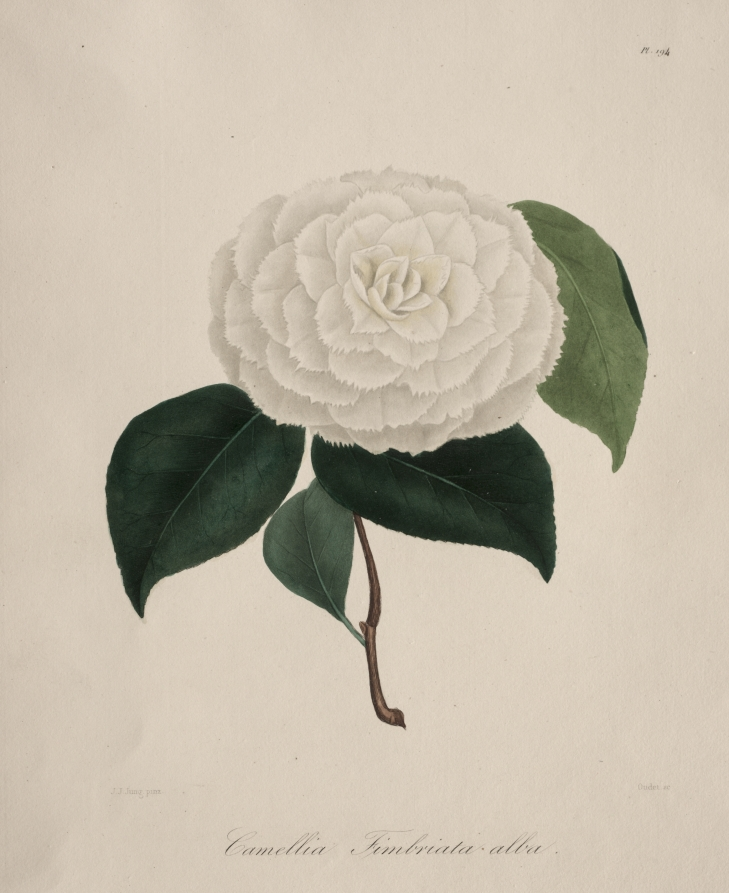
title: Iconographie du genre camellia: No. 194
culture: France, 19th century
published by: Abbé Laurent Berlèse (French)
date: 1839–1843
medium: stipple and line engraving, with hand coloring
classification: Print